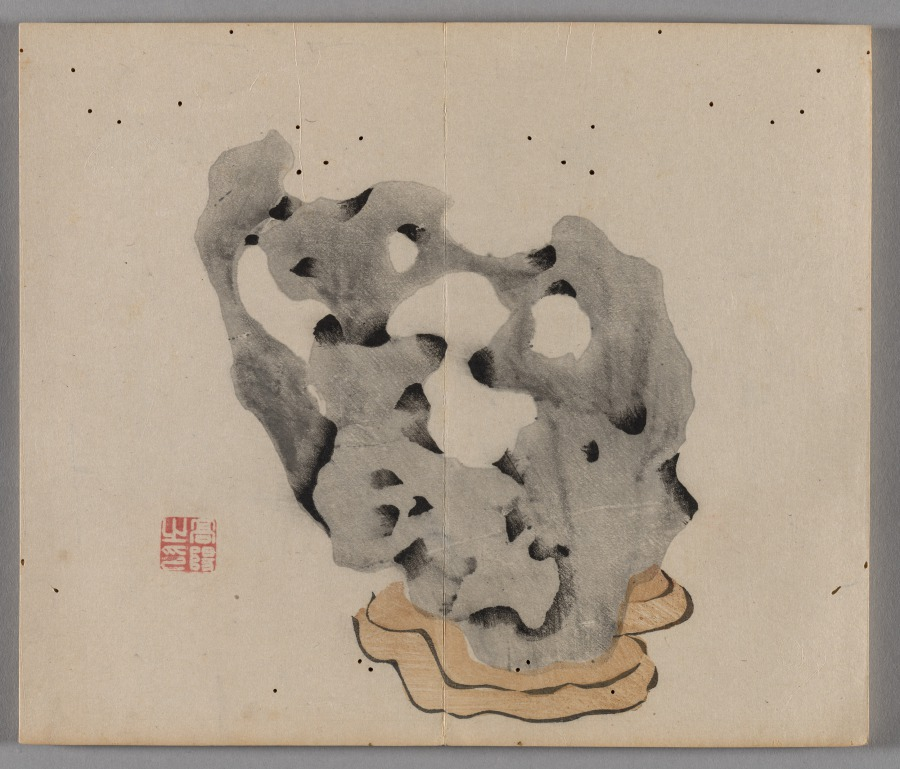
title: Ten Bamboo Studio Painting and Calligraphy Handbook (Shizhuzhai shuhua pu): Rocks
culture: China, Qing dynasty (1644-1911)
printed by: Hu Zhengyan (Chinese, c. 1584–1674)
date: 1633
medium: Woodblock-printed book; ink and colors on paper; first edition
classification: Print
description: Color printing reached a level of perfection in the early 1600s, as seen in this Ten Bamboo Studio Collection of Calligraphy and Painting and the Mustard Seed Garden Manual of Painting (printed 1679 and 1701). The painterly quality, precision in registering (aligning) the woodblocks, and harmonious colors made them the most successful color print editions in Chinese history. Both editions were printed and compiled in Nanjing, spread nationwide, and had a great impact on the arts in Japan and Korea.